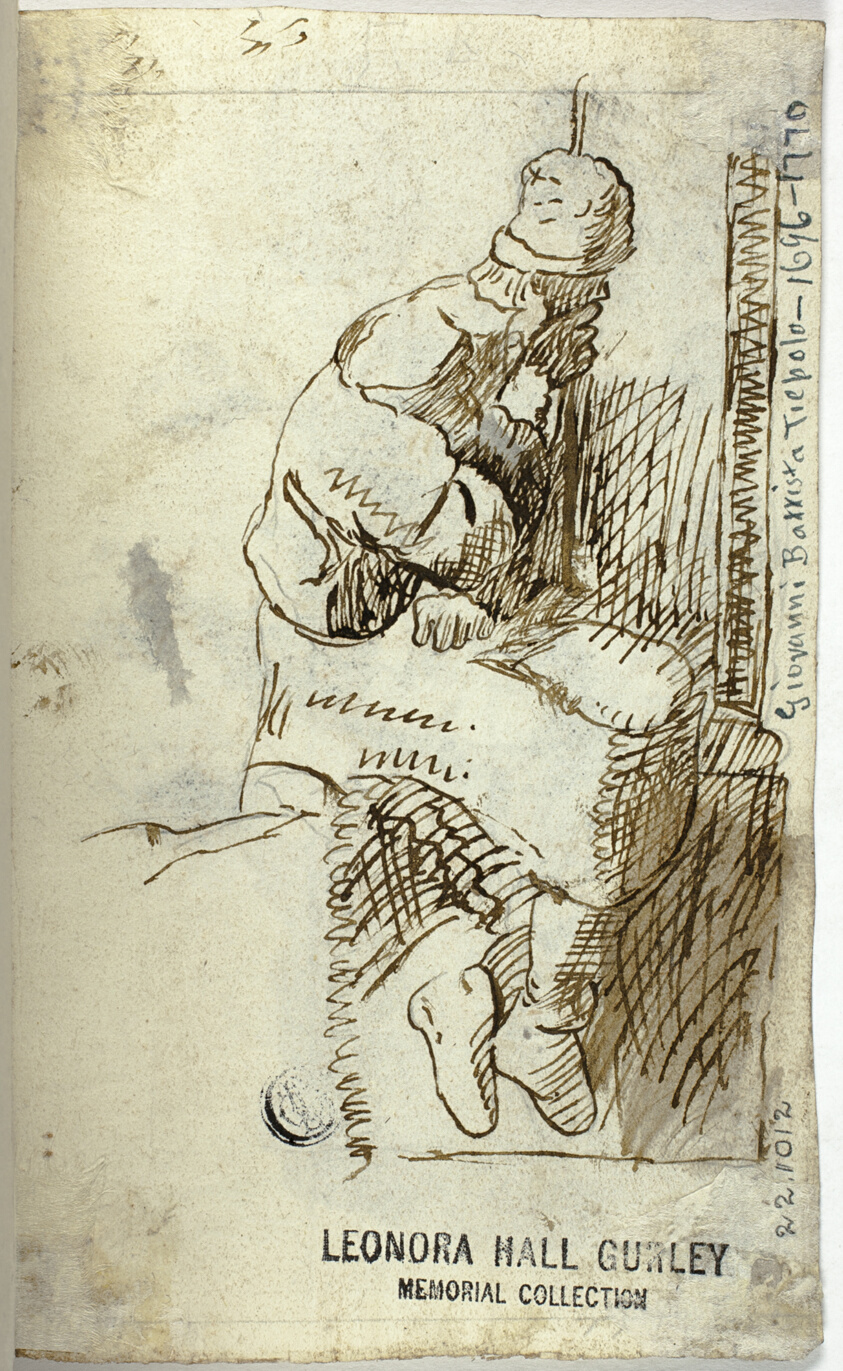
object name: Drawing and Watercolor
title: Three Seated Figures (recto); Seated Man in Profile (verso)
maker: Unknown Artist; Italian, 17th century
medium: Pen and brown ink and brush and gray wash on ivory laid paper (recto), and pen and brown ink with brush and brown wash on ivory laid paper (verso), tipped onto cream laid paper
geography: Italy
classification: pen and ink drawings; drawings (visual works); prints and drawing